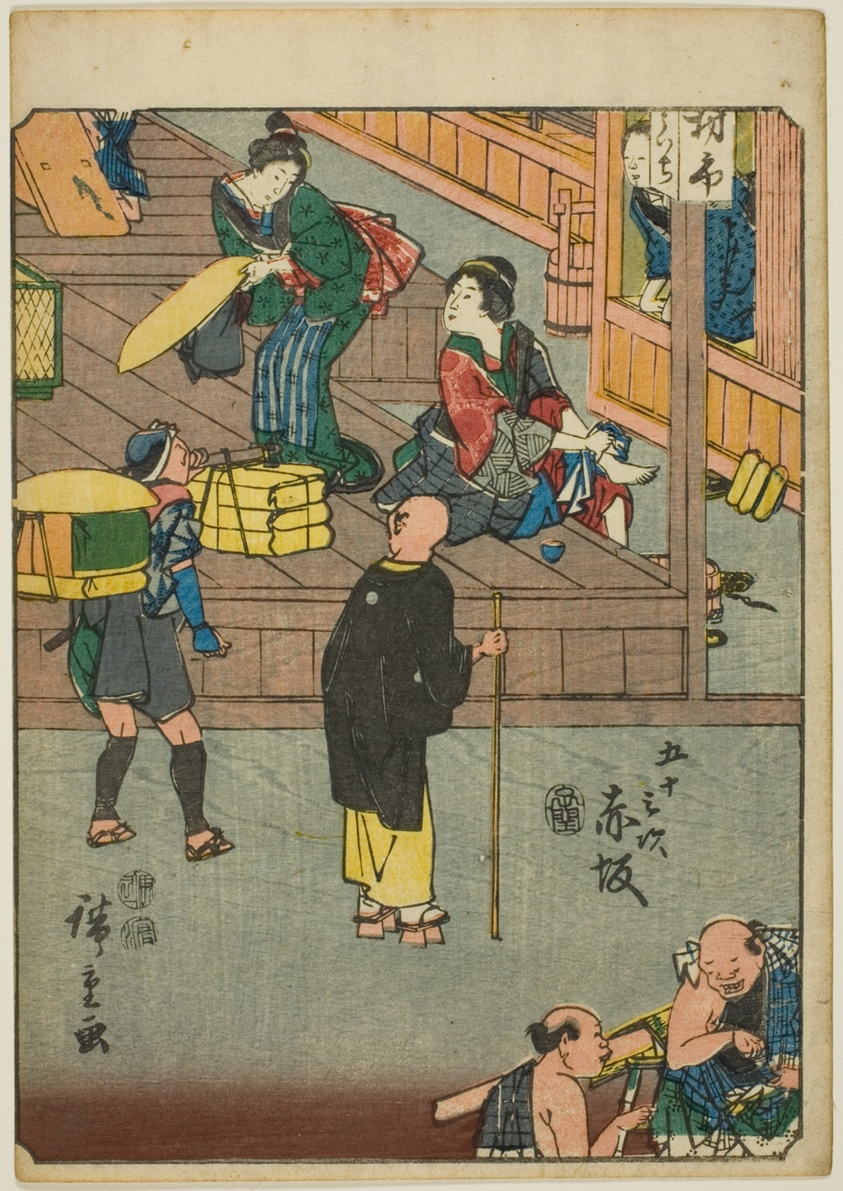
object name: Print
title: Akasaka, from the series "Fifty-three Stations [of the Tokaido] (Gojusan tsugi)," also known as the Figure Tokaido (Jinbutsu Tokaido)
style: Japanese (culture or style)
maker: Utagawa Hiroshige 歌川 広重; Japanese, 1797-1858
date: 1852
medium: Color woodblock print; chuban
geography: Japan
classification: woodblock print; print